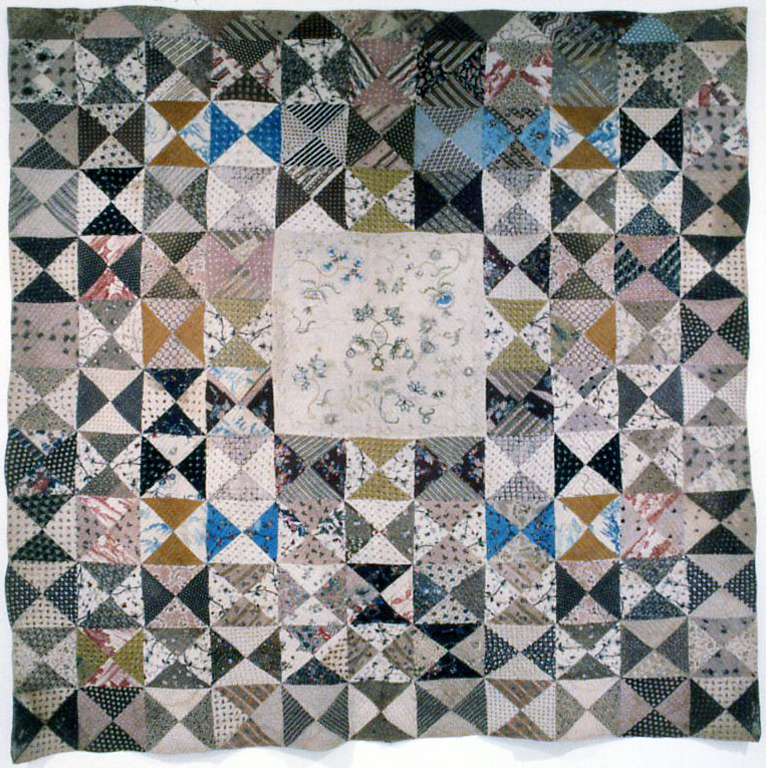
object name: Textile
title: Bedcover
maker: Mary Jones (American, active 1795/1820); New England or Mid-Atlantic, United States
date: 1795/1820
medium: Center: cotton, plain weave; embroidered with silk, cotton, and wool in buttonhole, chain, cross, single cross, feather, Roumanian, satin, single satin, stem, and twined double running stitches; Squares: cotton, cotton and linen, and linen, plain weaves; block, copperplate, and roller printed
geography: United States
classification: textile; needlework - quilt